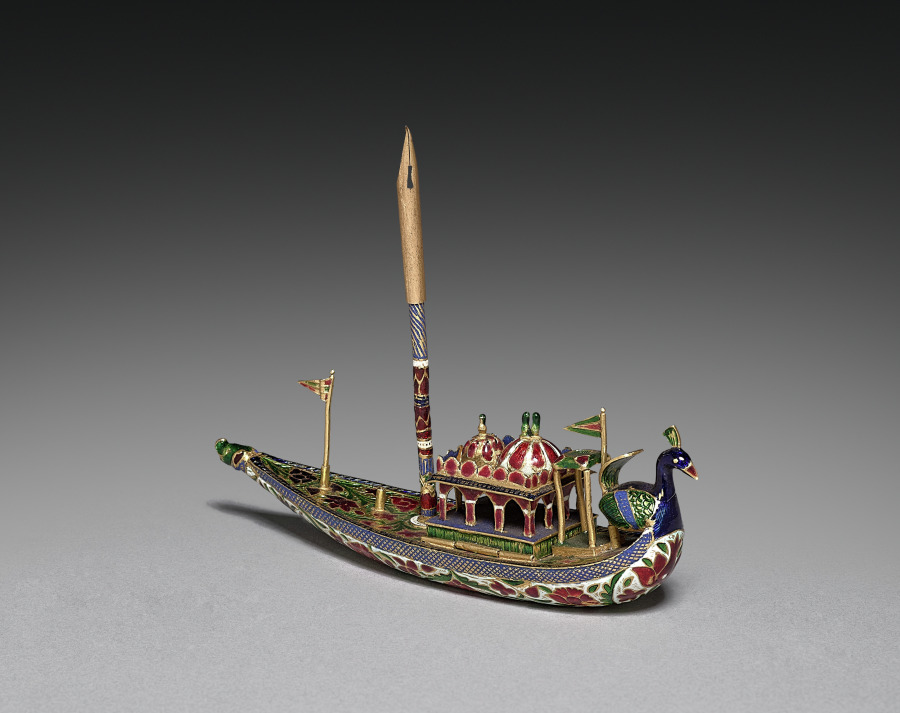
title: Inkstand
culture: Northwestern India, Rajasthan, Jaipur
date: 1800s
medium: Gold, silver, and enamel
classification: Jewelry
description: This enamel inkstand takes the fanciful form of a pleasure boat, linking the composing of poetry and the writing of calligraphy to the amusement of the senses. The luxurious materials and elegant form also indicate that scribal activities require a certain level of refinement. Cleverly, the enamelist placed a lotus design on the bottom of the vessel; as a flower that floats on water, the bloom represents both the water imaginatively splashing against the underside of the boat and the actual ink swishing inside the bilge. This inkstand was purchased by Cleveland Museum of Art founder Jeptha Homer Wade II (1857–1926) and his wife Ellen Garretson Wade (1857–1917) as they made a tour of India on their own pleasure boat, the Wadena.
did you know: The silver core of this inkwell has been covered in gold leaf.